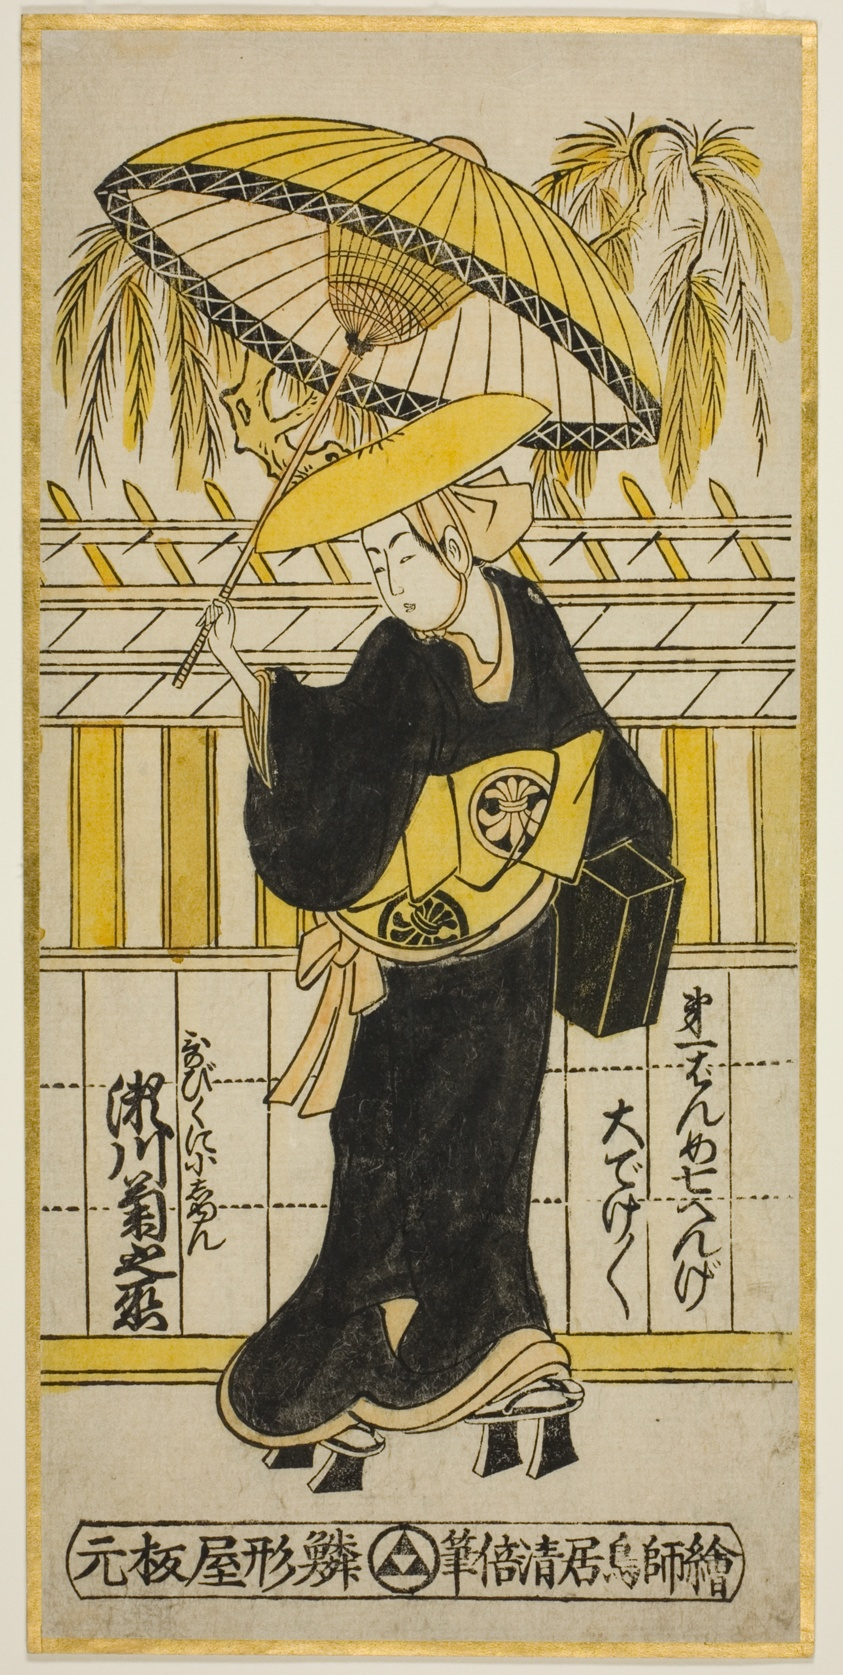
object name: Print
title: The Actor Segawa Kikunojo I as Utabikuni in the play "Fuji Miru Sato Sakae Soga" (?), performed at the Ichimura Theater in the first month, 1742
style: Japanese (culture or style)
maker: Torii Kiyomasu II (Japanese, 1706 (?)–1763 (?))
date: 1742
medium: Hand-colored woodblock print; hosoban, urushi-e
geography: Japan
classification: woodblock print; print; asian art